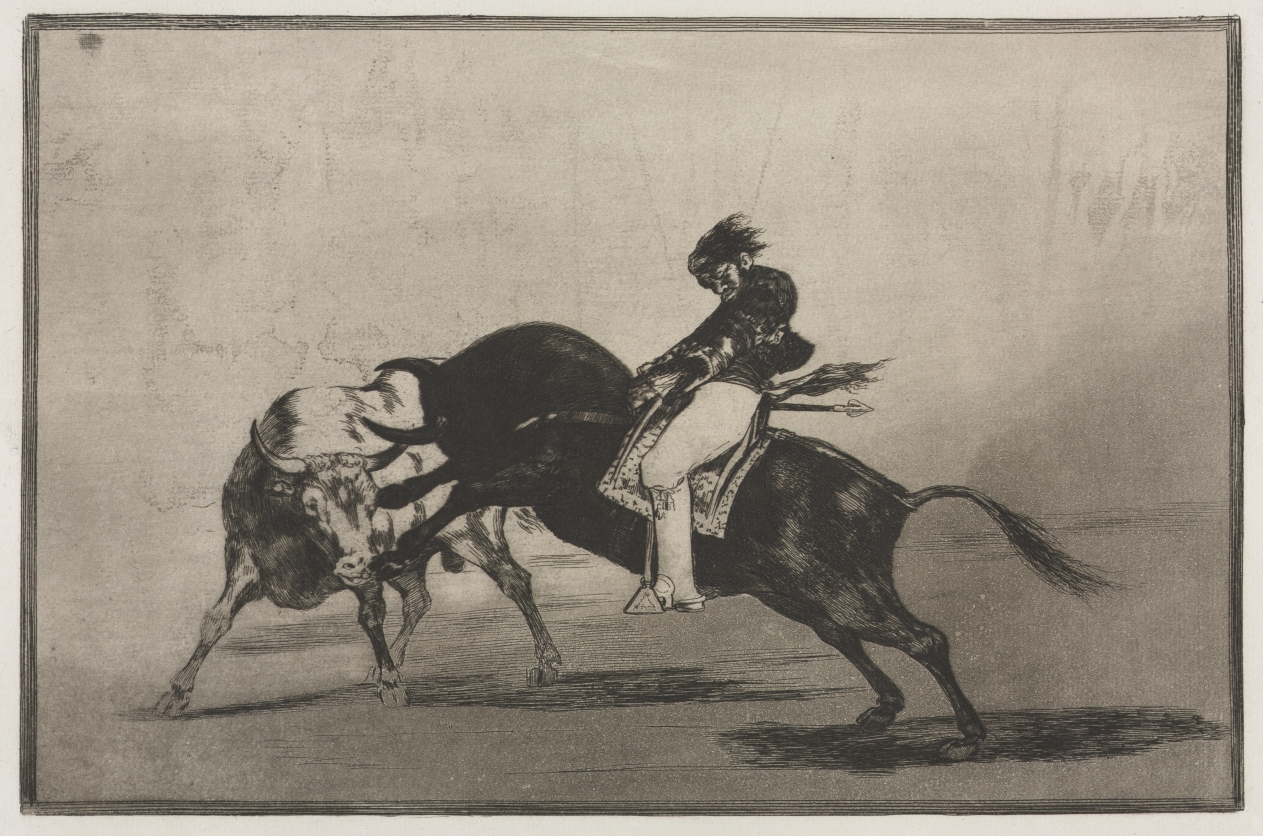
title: Bullfights: The Same Ceballos Mounted on Another Bull Breaks Short Spears in the Ring at Madrid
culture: Spain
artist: Francisco de Goya (Spanish, 1746–1828)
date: 1816, printed 1876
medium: engraving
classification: Print